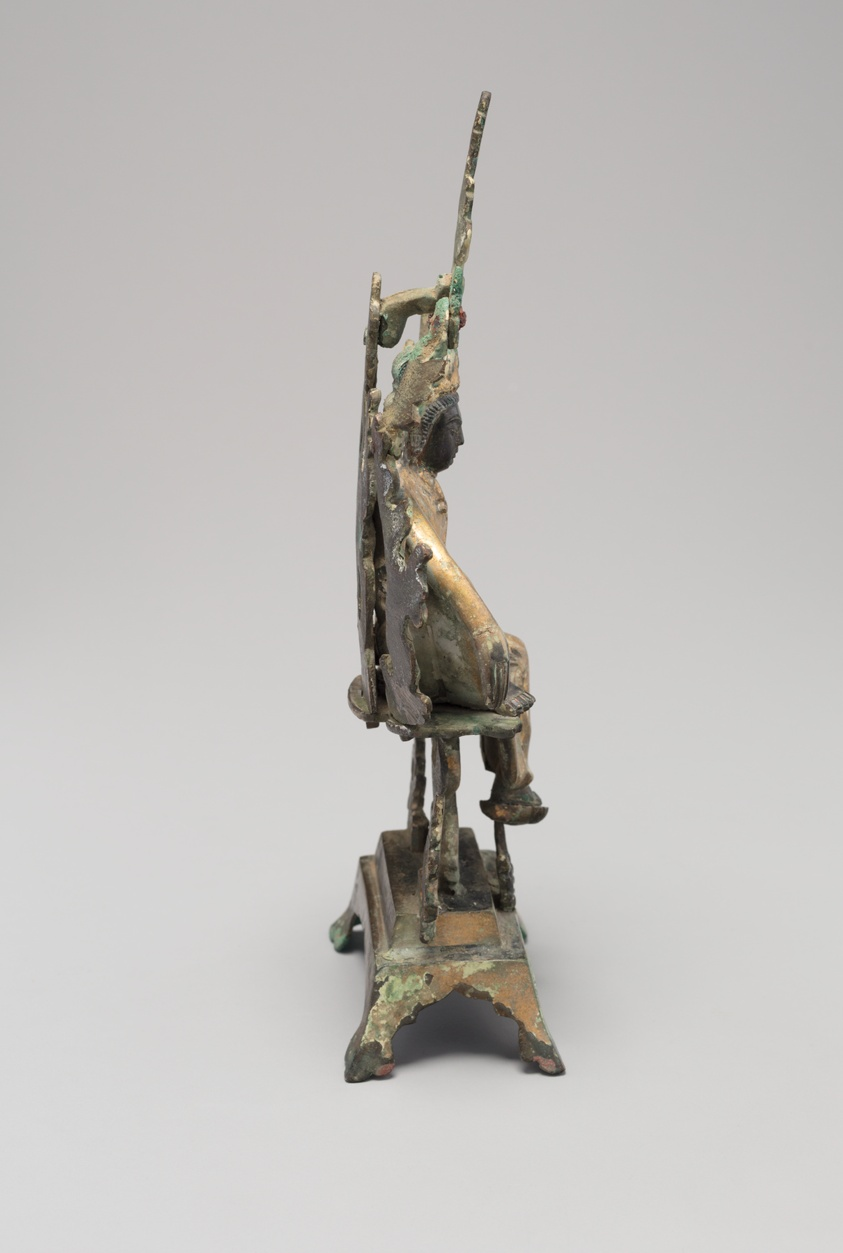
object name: Sculpture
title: South Sea Guanyin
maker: China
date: Song dynasty (960–1279)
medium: Gilt bronze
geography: China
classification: sculpture